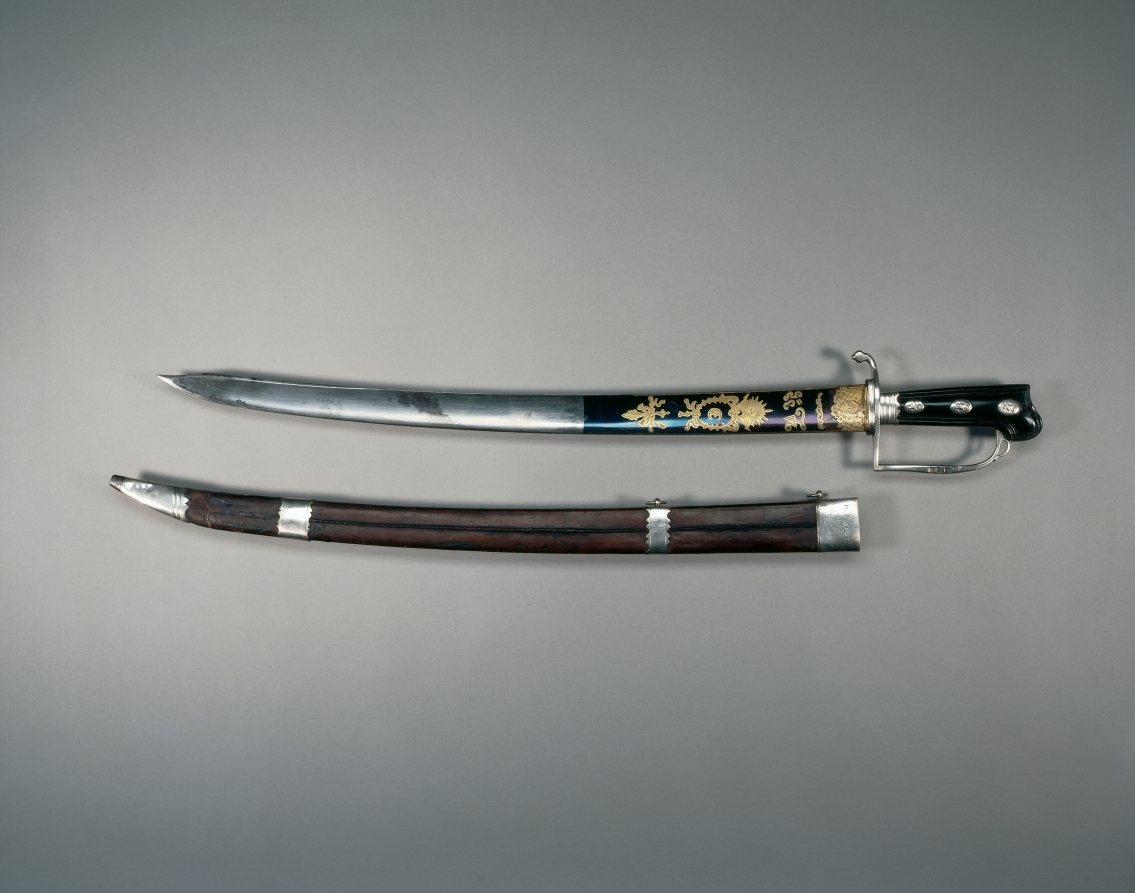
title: Hunting Sword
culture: England, London, 18th century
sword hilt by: William Kinman (British, 1724–1788?)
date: 1778–79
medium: Blued, etched, and gilded steel; hilt: silver, wood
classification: Arms and Armor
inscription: Inscription: D. DRURY, CUTLER TO HIS MAJESTY, STRAND